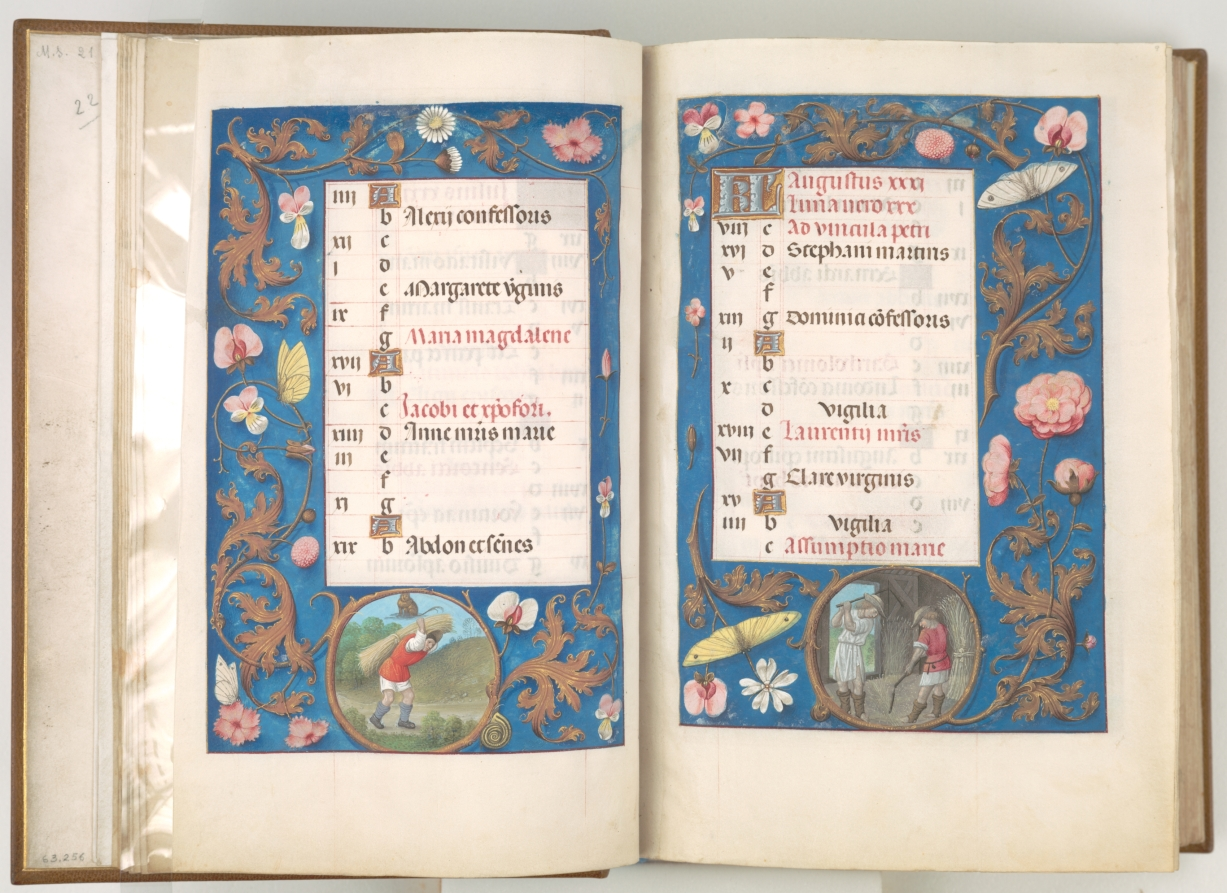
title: Hours of Queen Isabella the Catholic, Queen of Spain: Fol. 8v, July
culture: Flanders, Ghent and Bruges, late 15th century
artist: Master of the First Prayerbook of Maximillian (Flemish, c. 1444–1519)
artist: and Associates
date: c. 1500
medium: ink, tempera, and gold on vellum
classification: Bound Volume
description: A great lover of Flemish art, Queen Isabella treasured her many devotional books. This deluxe manuscript was created for her private devotions by highly organized and distinctly talented manuscript painters active in Ghent and Bruges. The Ghent-Bruges school represents the culmination of Flemish book painting, whose main features were the use of rich colors, illusionistic effects, a love of landscape, and a strong sense of visual narrative. Manuscripts produced by this circle of artists are renowned for their border decoration featuring a rich variety of realistically painted flowers, scrolling acanthus leaves, birds, and butterflies.